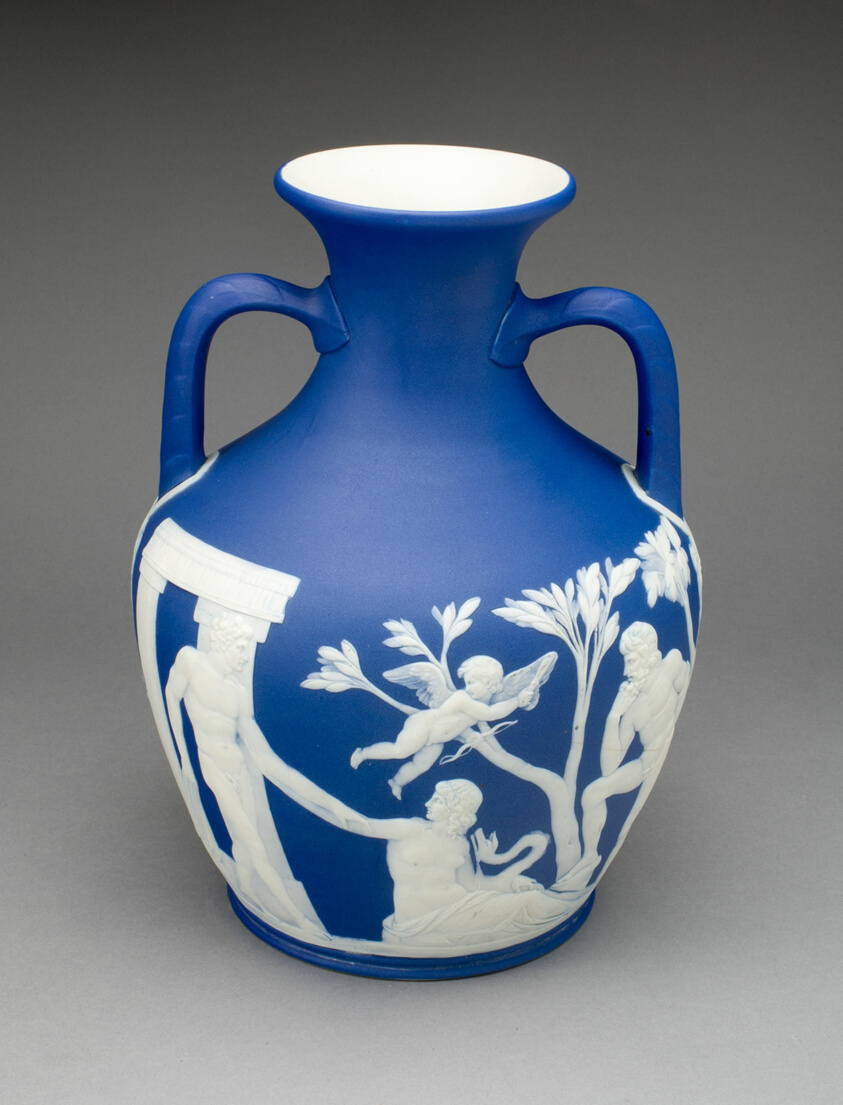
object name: Ceramics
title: Portland Vase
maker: Wedgwood Manufactory (England, founded 1759)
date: 1860/80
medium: Stoneware (jasperware)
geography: Burslem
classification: vase; vessel; ornamental piece; stoneware; european decorative arts; ceramics